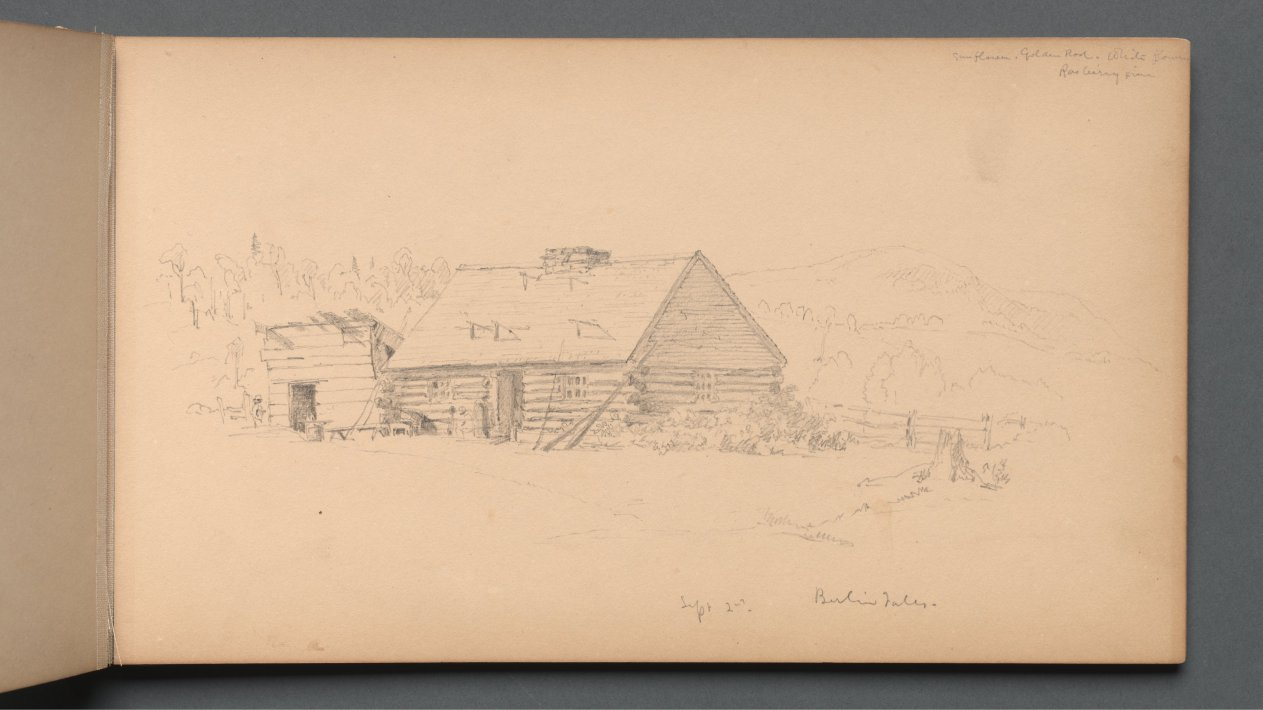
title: Sketchbook, page 14: "Berlin Falls September 2nd"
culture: America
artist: Sanford Robinson Gifford (American, 1823–1880)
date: 1859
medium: graphite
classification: Bound Volume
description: Gifford was an American landscape painter belonging to the second generation of Hudson River school artists. Based in New York City with a studio at the Tenth Street Studio Building, Gifford took annual summer trips to the Catskills, the Adirondacks, and other scenic locations in New England. This sketchbook accompanied the artist on his expedition in 1859 to New Hampshire and Maine, where he drew sites such as Dixville Notch, the White Mountains, and Peaks Island, Casco Bay. Gifford used such graphite studies as the basis for oil paintings worked up in his studio, such as A Home in the Wilderness (1866).